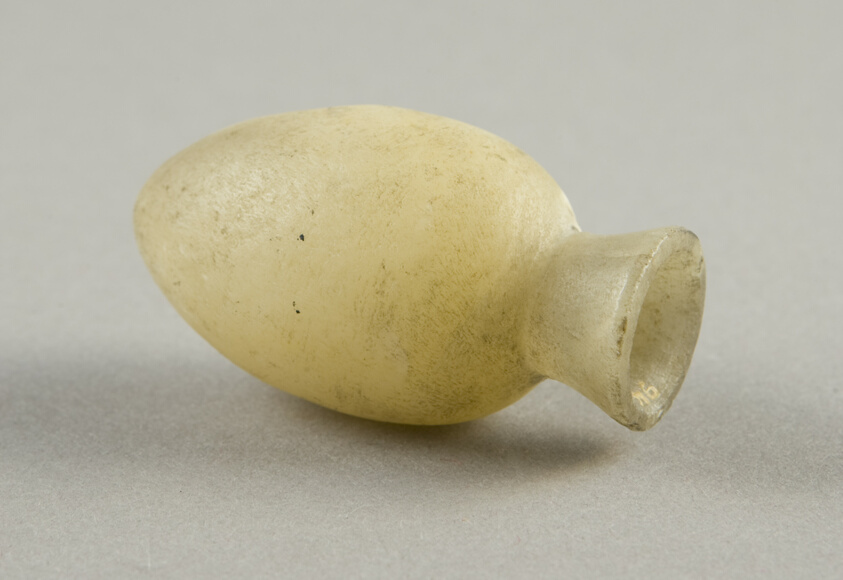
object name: Vessel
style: roman period (egyptian), greco-roman (egyptian)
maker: Egyptian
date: Third Intermediate Period (?) (about 1069–664 BCE)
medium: Travertine (Egyptian alabaster)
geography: Egypt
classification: vessel; stone; ancient art